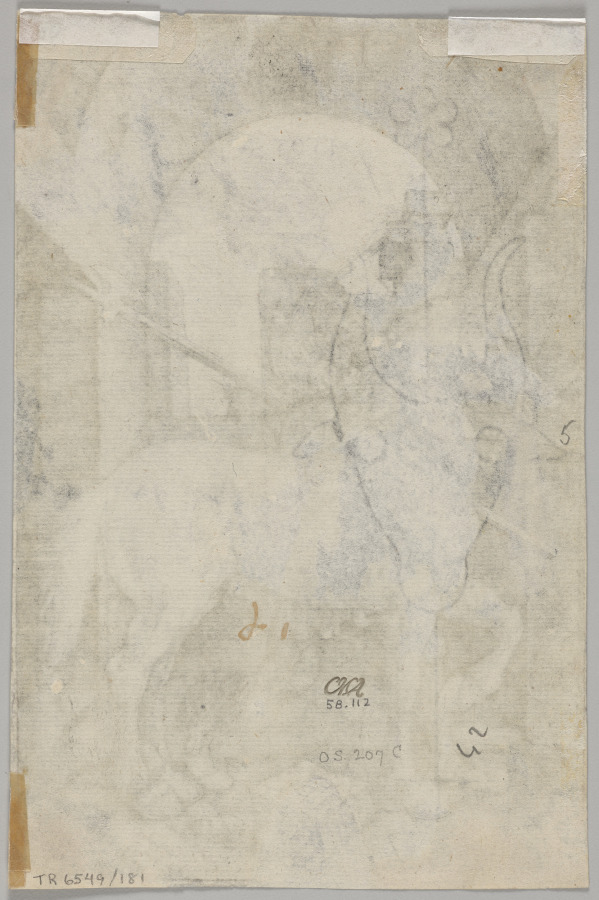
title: The Small Horse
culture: Germany, early 16th Century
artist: Albrecht Dürer (German, 1471–1528)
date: 1505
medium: engraving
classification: Print